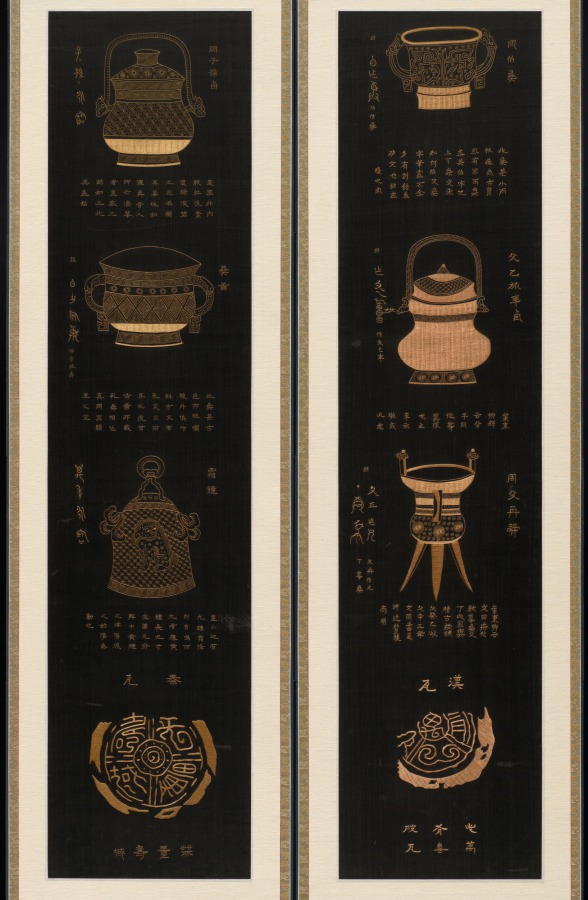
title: Ancient Chinese Bronzes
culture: Korea, Joseon dynasty (1392–1910)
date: late 1800s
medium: Ten-panel folding screen; embroidery, gold silk threads on black silk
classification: Textile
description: This embroidered folding screen depicts a set of bronze vessels. While the subject of bronze vessels is part of mainstream male elite culture, which centered on ancestral rituals, the written text that accompanies each bronze vessel expresses the idea of evoking good fortune and wishing for many children. The is perhaps related to the idea that those who diligently perform rituals for the spirit of ancestors could have all their aspirations realized.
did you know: The written text that accompanies each bronze vessel depicted in this embroidered screen expresses the idea of evoking good fortune and wishing for many children.